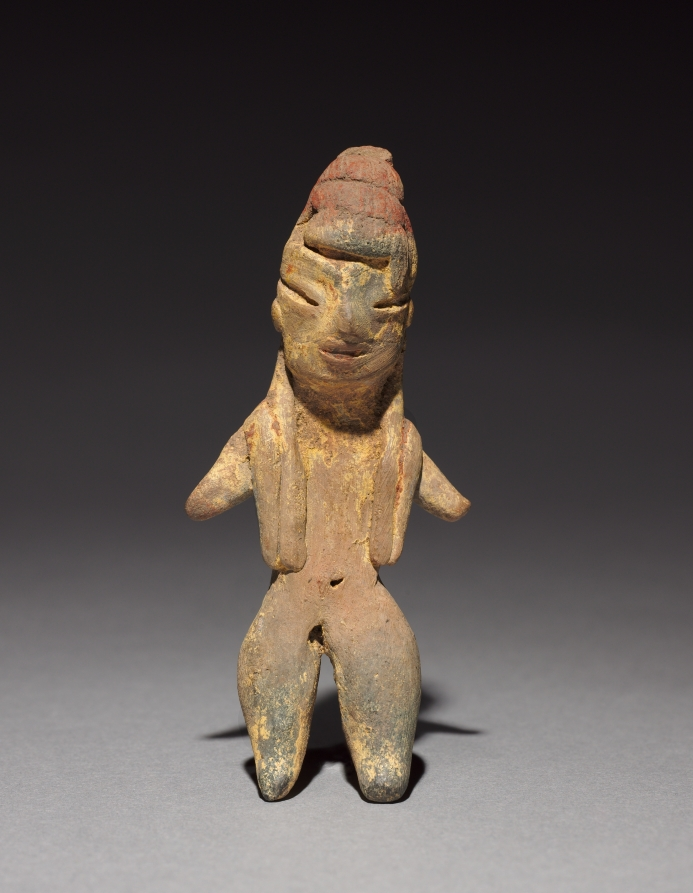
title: Archaic Figurine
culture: Mesoamerica, Central Mexico, Tlatilco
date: c. 1200–900 BCE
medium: earthenware with pigment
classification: Ceramic